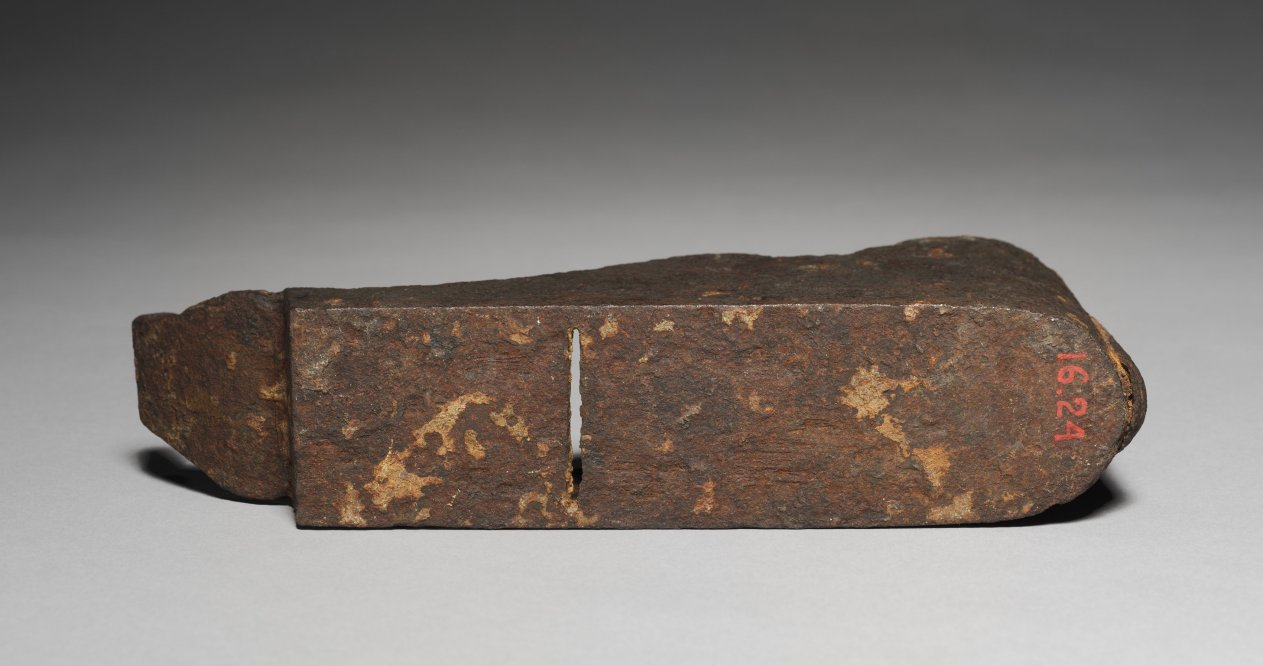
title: Carpenter's Plane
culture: Italy, 15th century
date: 1400s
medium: wood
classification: Tool